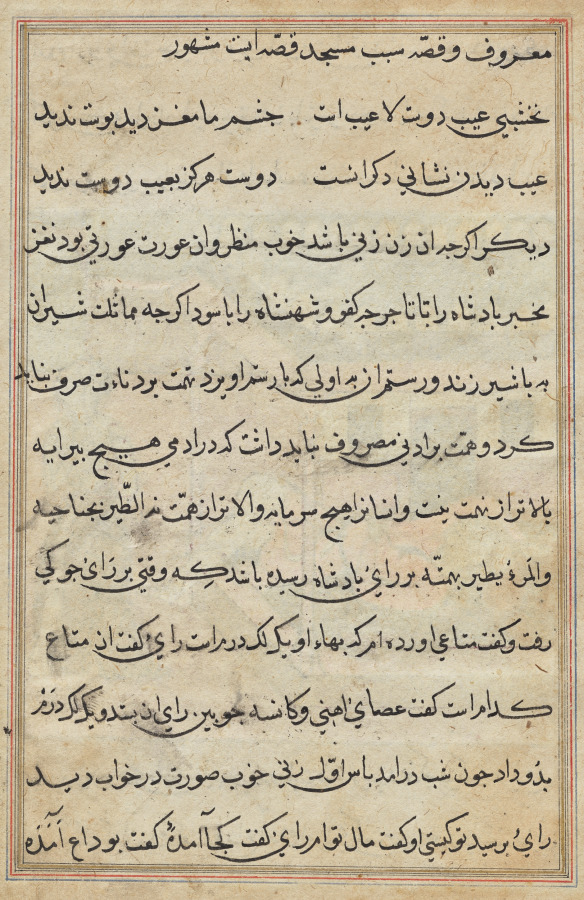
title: Page from Tales of a Parrot (Tuti-nama): text page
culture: Mughal India, court of Akbar (reigned 1556–1605)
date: c. 1560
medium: gum tempera, ink, and gold on paper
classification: Painting